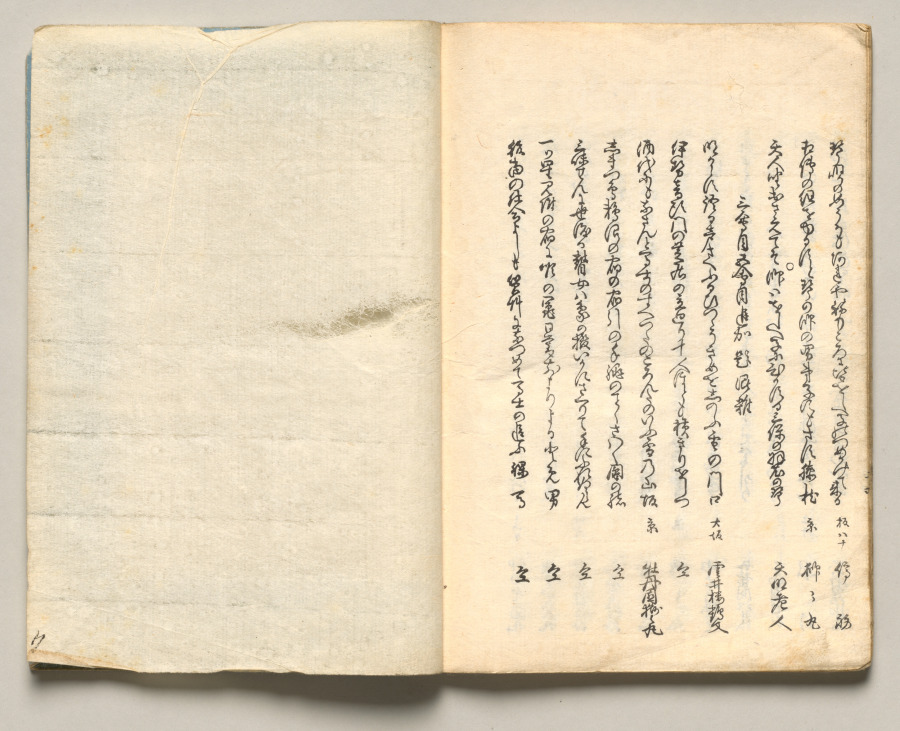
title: Spread Twenty-Two from Volume Six of People of Japan in Light Verse (Kyōka)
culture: Japan, Edo period (1615–1868)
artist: Utagawa Hiroshige (Japanese, 1797–1858)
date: 1857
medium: Woodblock-printed book; ink and color on paper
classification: Bound Volume